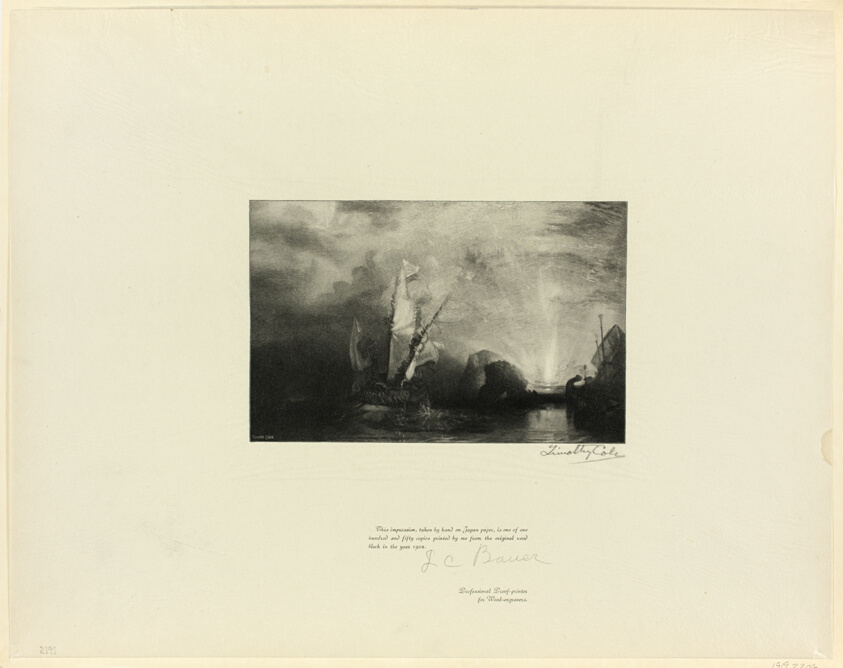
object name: Print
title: Ulysses Deriding Polyphenus, from Old English Masters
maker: Timothy Cole (American, born England, 1852-1931); after Joseph Mallord William Turner (English, 1775-1851)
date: 1900, printed 1902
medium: Wood engraving on chine paper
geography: United States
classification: wood engraving; print; prints and drawing